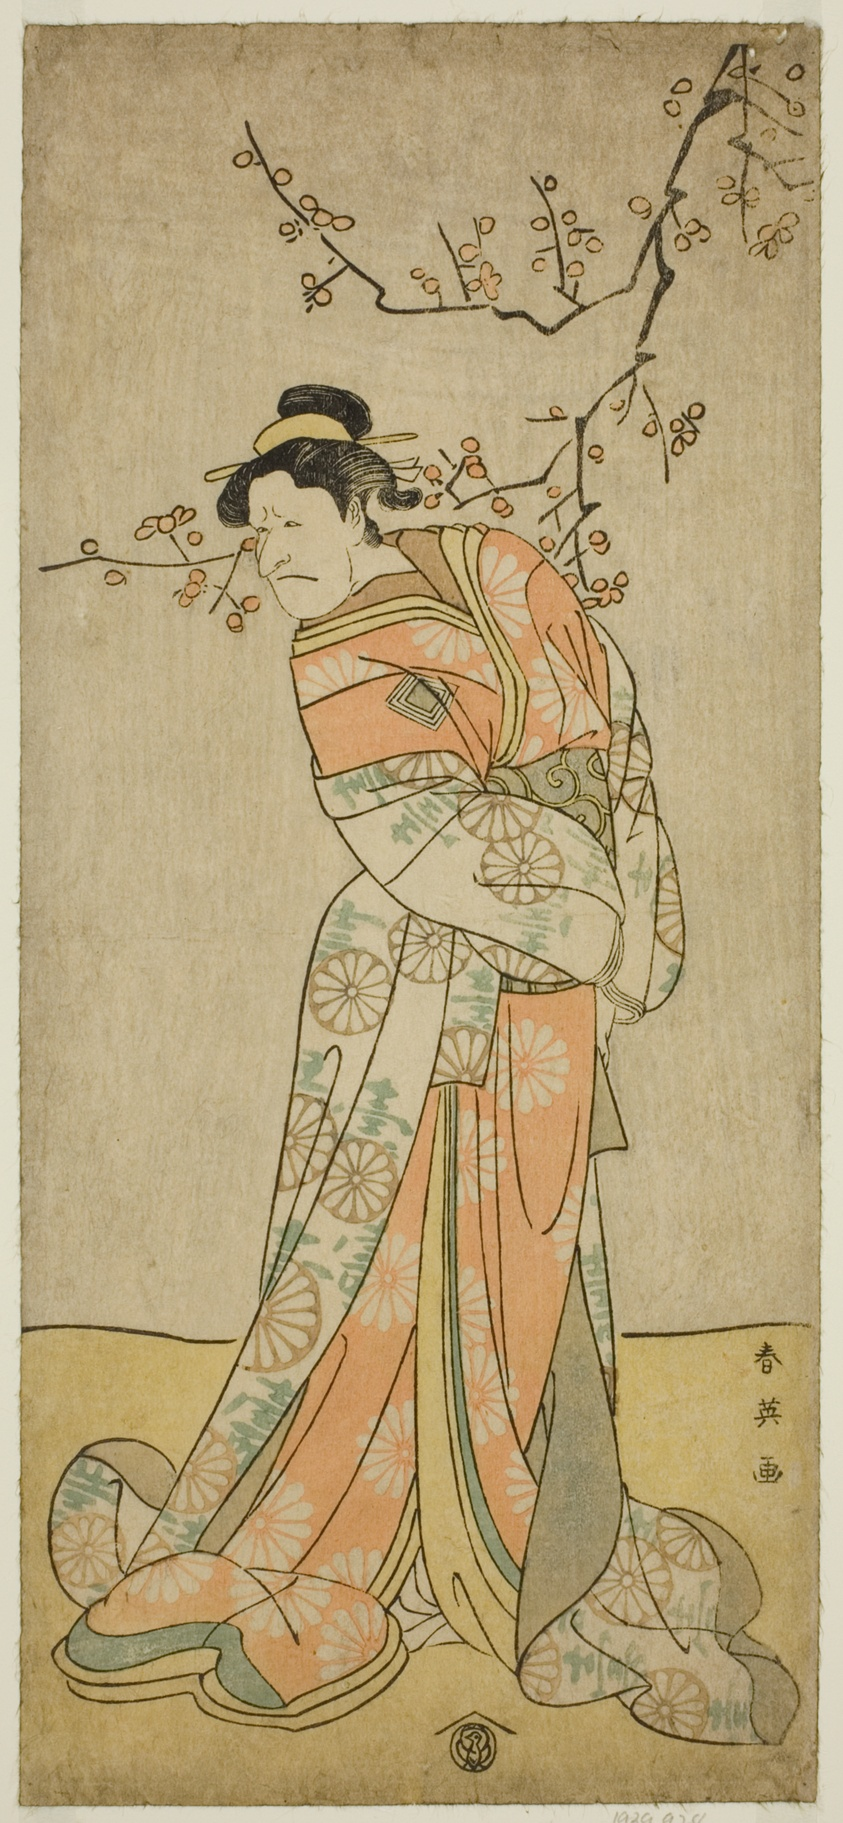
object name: Print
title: The Actor Ichikawa Ebizo (Danjuro V) as the Lady-in-Waiting Iwafuji in the Play Gozen-gakari Sumo Soga, Performed at the Kawarazaki Theater in the First Month, 1793 (?)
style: Japanese (culture or style)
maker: Katsukawa Shun'ei (Japanese, 1762-1819)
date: c. 1793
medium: Color woodblock print; hosoban; right sheet of diptych (?)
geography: Japan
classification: woodblock print; print; asian art